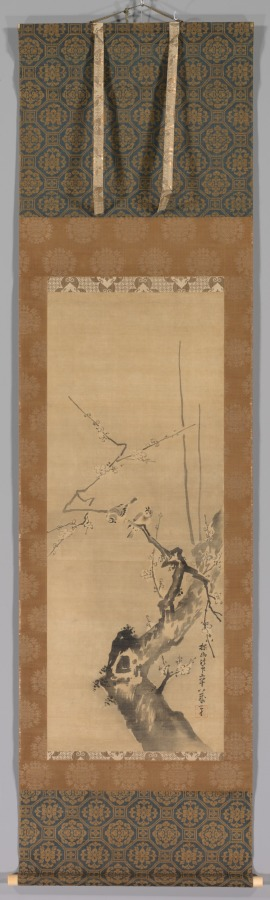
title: Sparrows on Blossoming Plum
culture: Japan, Edo period (1615–1868)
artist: attributed to Kano Tan’yū (Japanese, 1602–1674)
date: 1661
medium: One of a triptych of hanging scrolls; ink and slight color on silk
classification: Painting